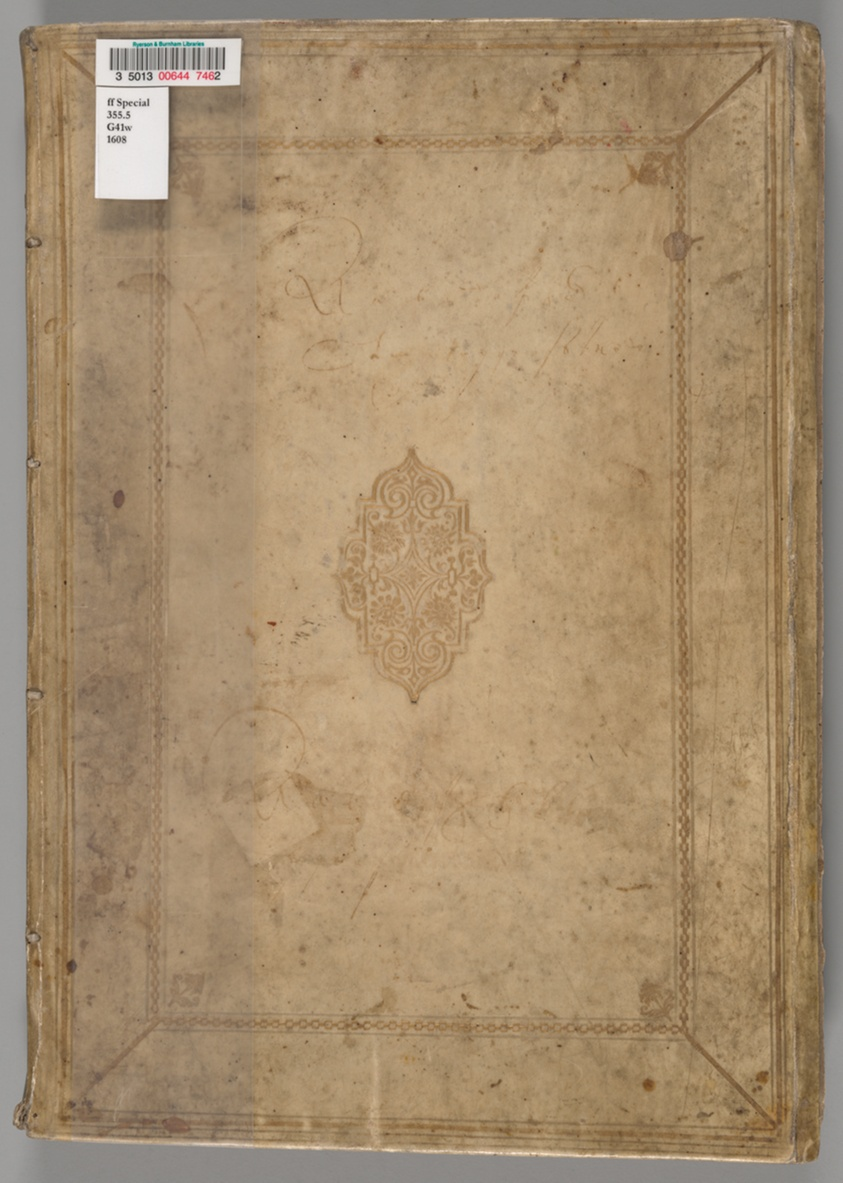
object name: Book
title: Exercise of Arms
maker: Jacob de Gheyn, II (Dutch, 1565-1629)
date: 1608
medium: Illustrated book featuring 117 copper plate engravings on ivory laid paper; full vellum binding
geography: Netherlands